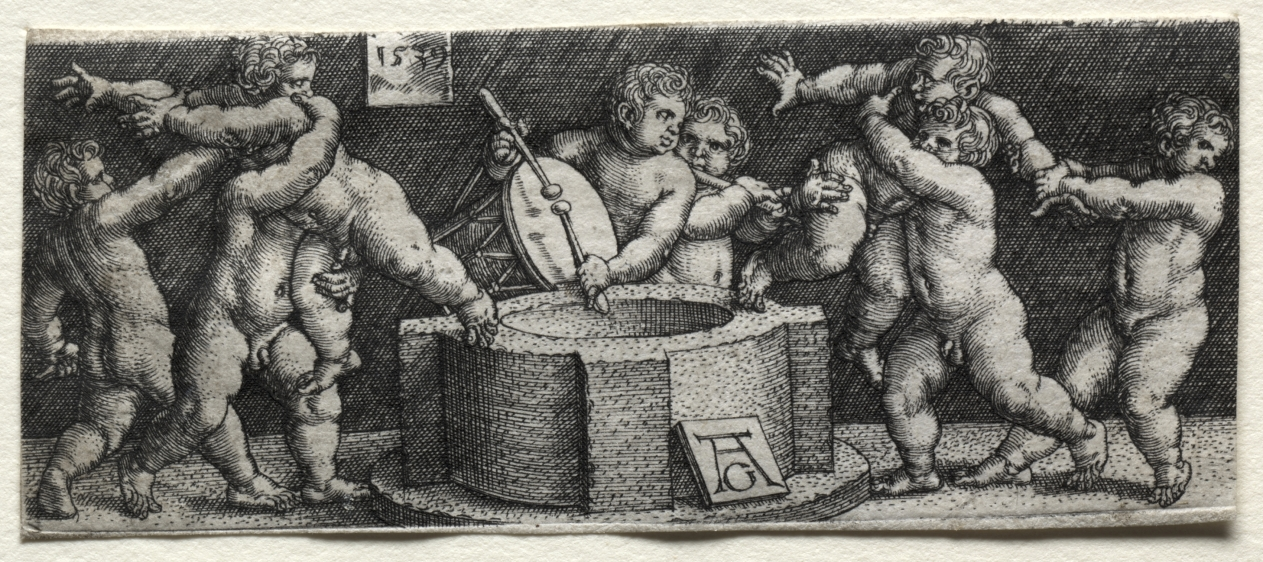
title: Eight Nude Children at a Well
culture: Germany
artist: Heinrich Aldegrever (German, 1502–1555/61)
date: 1539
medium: engraving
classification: Print